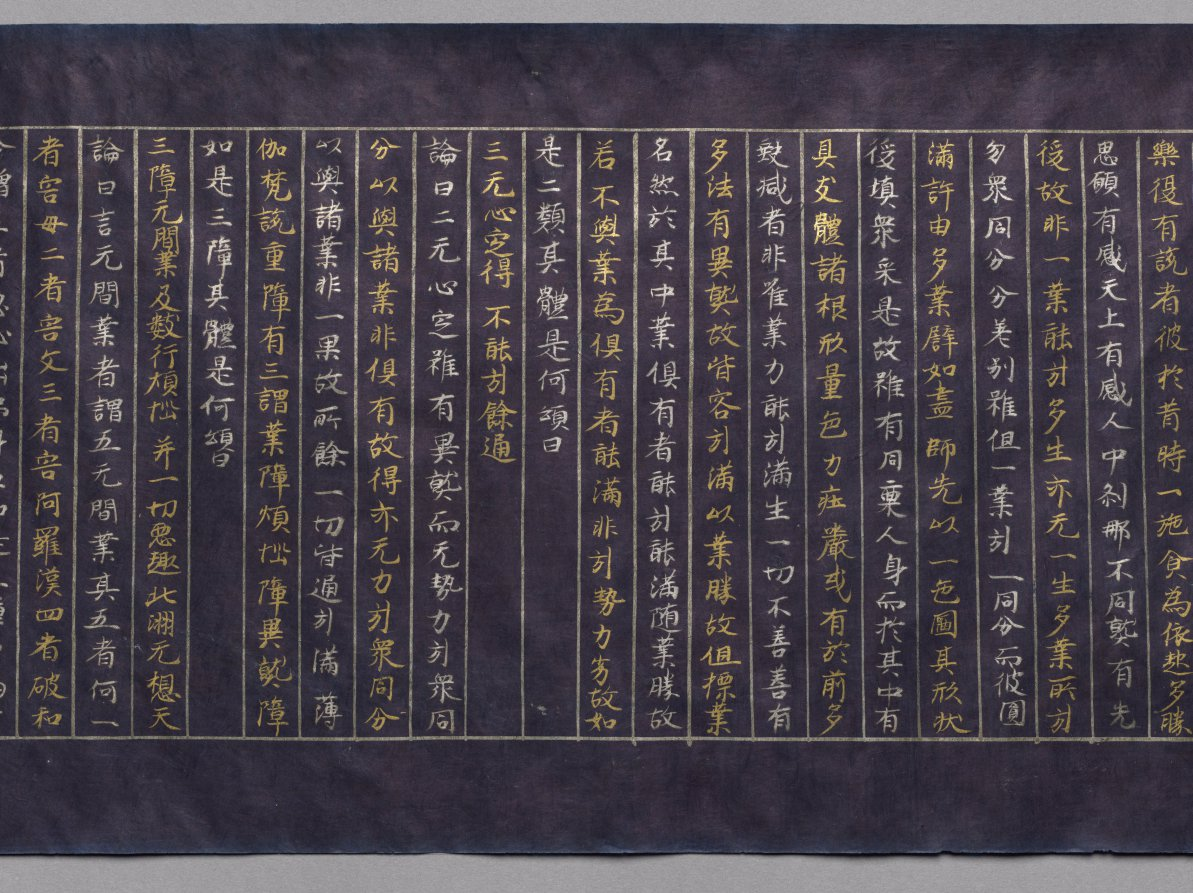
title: Meta-Discourse on the Teachings from the Treasury (Abidharmakosha-Bhashya)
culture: Japan, Heian period (794–1185)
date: 1100s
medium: handscroll; gold and silver on indigo-dyed paper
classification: Manuscript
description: This religious text relates some of the teachings of the great fourth-century Indian Buddhist scholar Vasubhandhu. The text analyzes human consciousness in its relationship to the environment and transformations that occur during meditation. This scroll is the 17th part of a 30-part translation of the text by Xuanzang, an eminent seventh-century Chinese monk.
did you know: The frontispiece depicts the Buddha Shakyamuni preaching in a paradisical landscape.